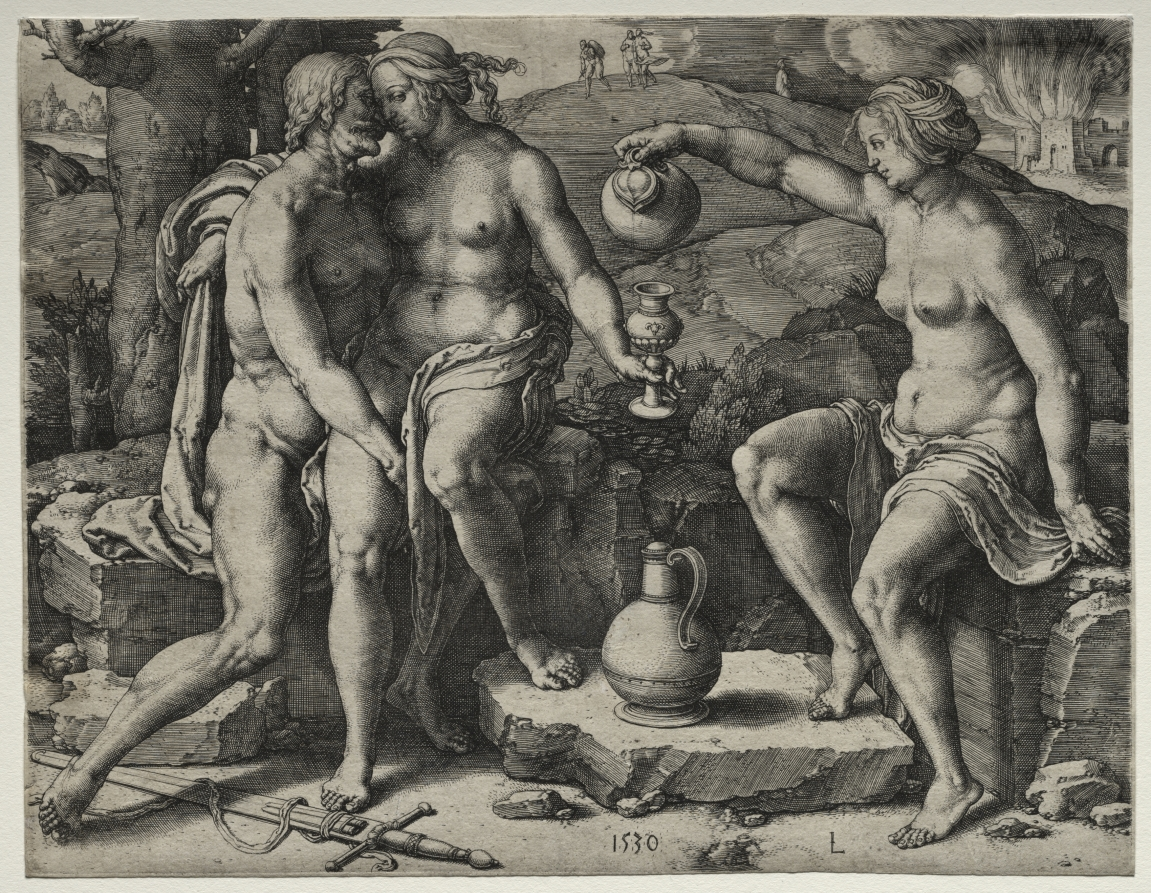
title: Lot and His Daughters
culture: Netherlands, 16th century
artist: Lucas van Leyden (Netherlandish, 1494–about 1533)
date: 1530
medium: engraving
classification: Print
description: Few Old Testament stories are more morally charged than that of Lot and his daughters. After fleeing the city of Sodom, Lot’s wife disobeyed God and looked back at the city and was turned into a pillar of salt. Believing that they were the last humans on earth, Lot’s two daughters conspired to intoxicate their father with wine to conceive children with him. Lucas van Leyden’s interpretation takes license with the episode’s moral impropriety, doubling down on its erotic content by showing the daughters as naked temptresses and Lot, much younger than described, overwhelmed with desire.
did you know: The middle ground of this image depicts Lot leaving behind the salt-pillar figure of his wife with his two daughters trailing behind him. The nakedness of the figures and Lot's dejected posture echo representations of Adam and Eve being expelled from paradise.